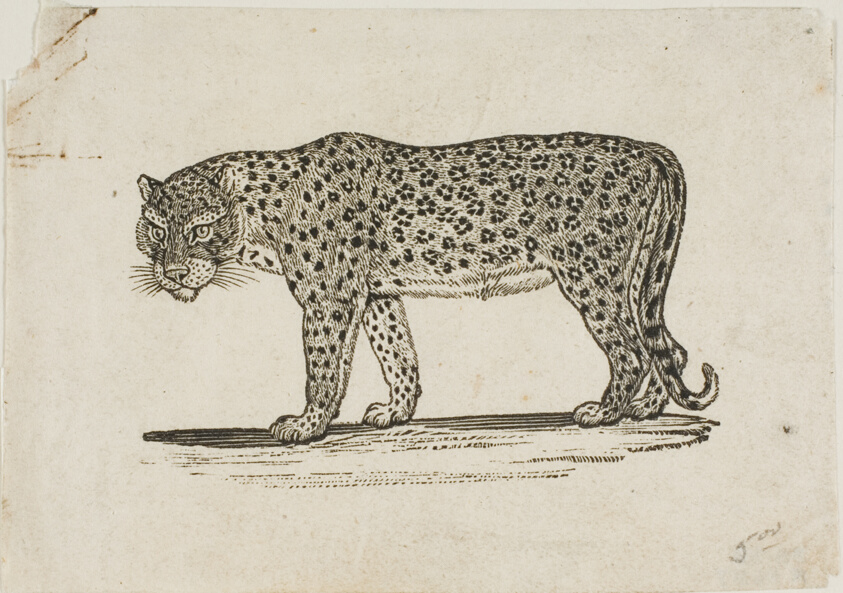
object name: Print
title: Leopard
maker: Thomas Bewick (English, 1753-1828)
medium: Woodcut on ivory wove paper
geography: England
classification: wood engraving; print; prints and drawing